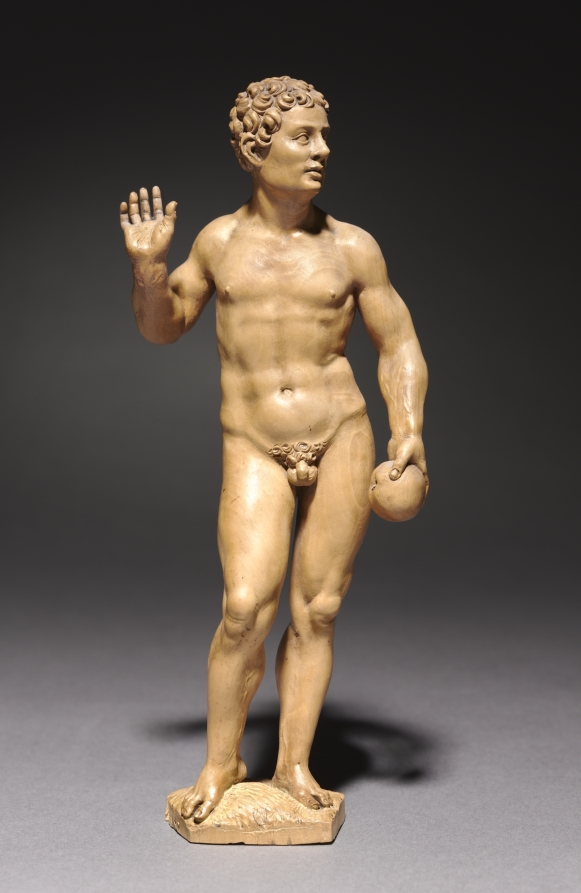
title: Adam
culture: Germany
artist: Daniel Mauch (German, 1477–1540)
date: c. 1535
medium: boxwood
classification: Sculpture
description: Mauch straddled the late medieval and Renaissance traditions in his career. These small-scale statuettes, however, each made from a single piece of boxwood, stem from the most progressive strands of Renaissance art in southern Germany, closely connected to developments in both Italian and German bronze sculpture. The bodies reveal Mauch's careful study of human anatomy as well as a rapport with Albrecht Dürer's well-known print of the same subject.